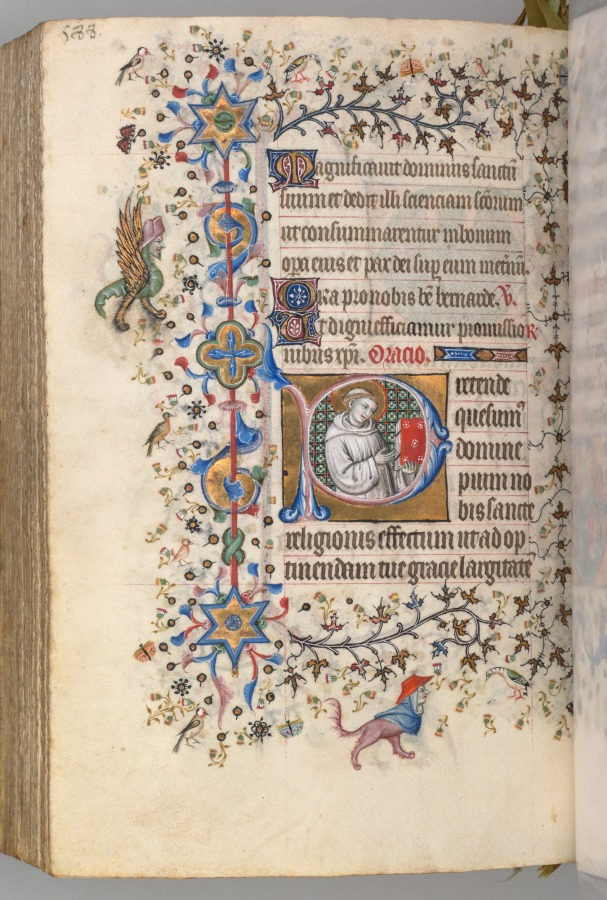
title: Hours of Charles the Noble, King of Navarre (1361-1425): fol. 288v, St. Hervard (?)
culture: France, Paris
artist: Master of the Brussels Initials and Associates (French)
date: c. 1405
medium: ink, tempera, and gold on vellum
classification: Bound Volume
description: This precious volume was obviously highly prized by its owner, the French-born King of Navarre, who had his coat of arms painted on no less than twenty folios. Rather than directly commissioning this manuscript from a specific workshop, it seems that Charles the Noble acquired his book of hours -- perhaps ready-made for the luxury market -- while on a trip to Paris in 1404-05. A collaborative effort, six painting styles are evidenced within the pages of this codex, those of two Italians, two Frenchmen, and two Netherlanders. The painter who was responsible for the planning and decoration of the book, and who produced seventeen of the large miniatures, was a Bolognese artist known as the Master of the Brussels Initials. His principal assistant, responsible for most of the borders, was a Florentine who signed his name "Zecho" da Firenze on folio 208 verso.